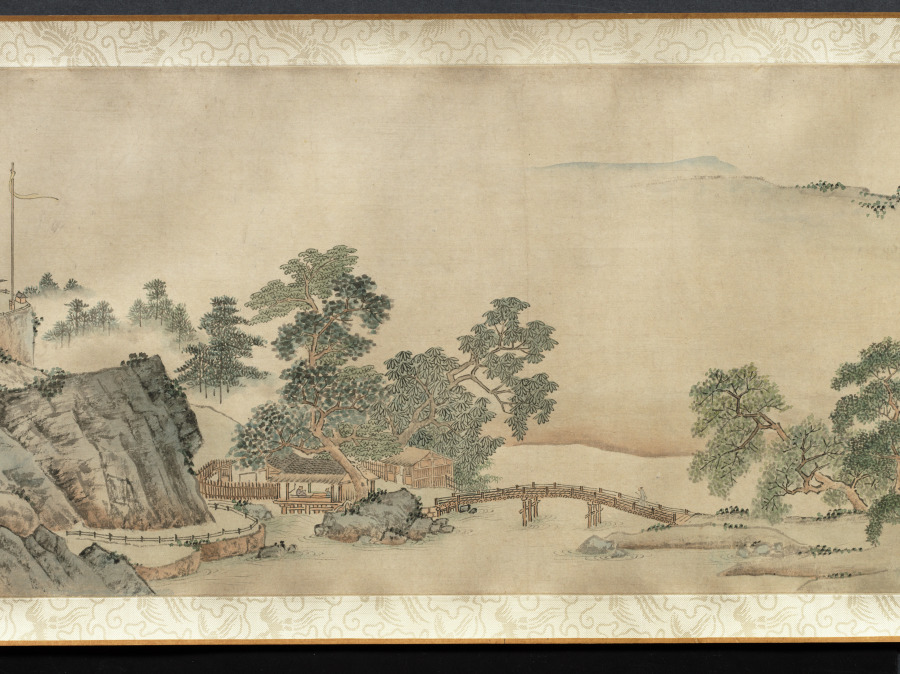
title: Ten Thousand Li of the Yangzi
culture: China, Ming dynasty (1368–1644)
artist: Dai Jin (Chinese, 1388–1462)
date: c. 1400s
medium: Handscroll; ink and color on paper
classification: Painting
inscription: Two colophons at end. Artist's seals: Dai Jin 戴進 and Wenjin 文進.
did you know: Dai Jin is traditionally considered the founder of the Zhe School, a style of landscape painting.